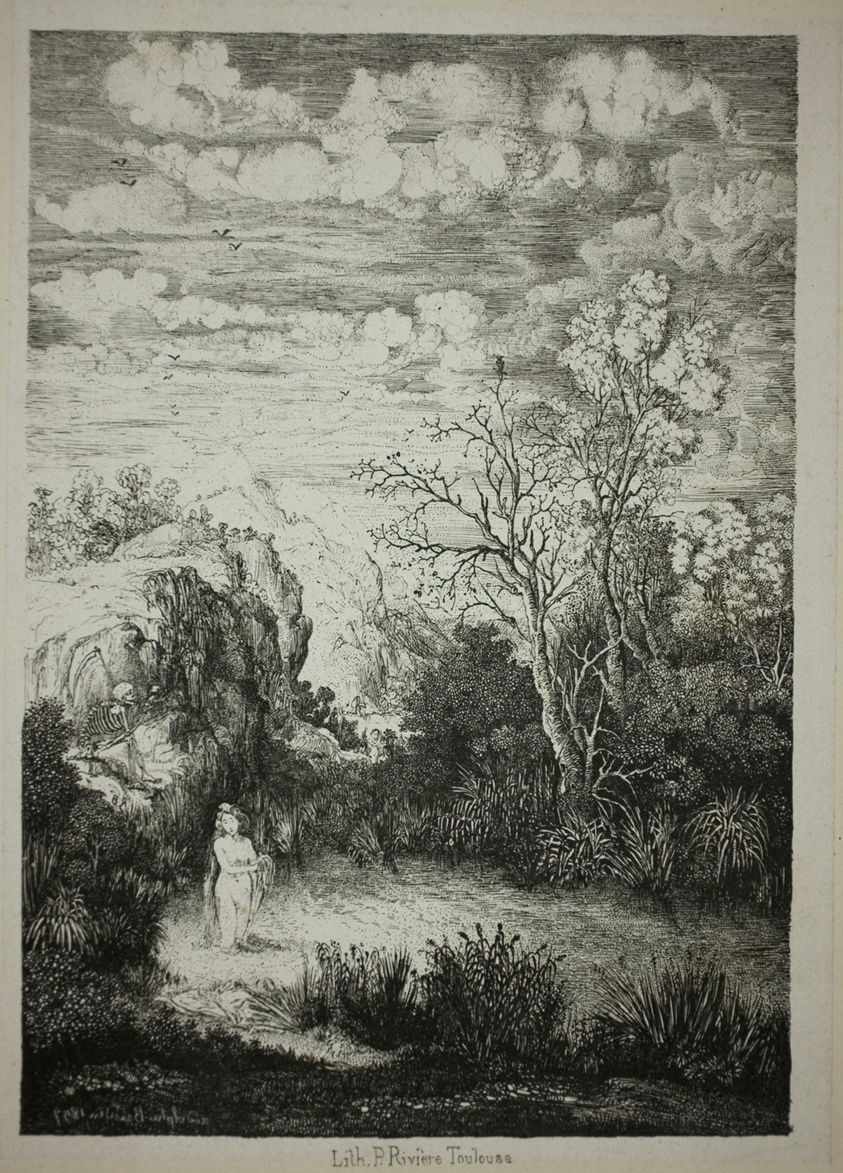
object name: Print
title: Bathing Woman and Time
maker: Rodolphe Bresdin (French, 1825-1885)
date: 1857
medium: Lithograph (etching transfer) on light gray chine laid down on ivory card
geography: France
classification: lithograph; print; prints and drawing